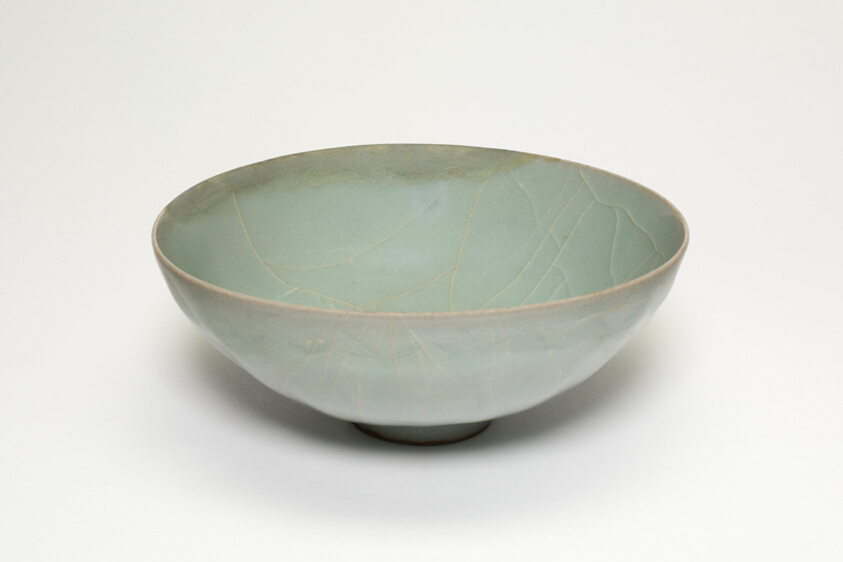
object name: Vessel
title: Bowl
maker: China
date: Song dynasty (960-1279)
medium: Guan ware; stoneware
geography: China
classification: ceramics; asian art